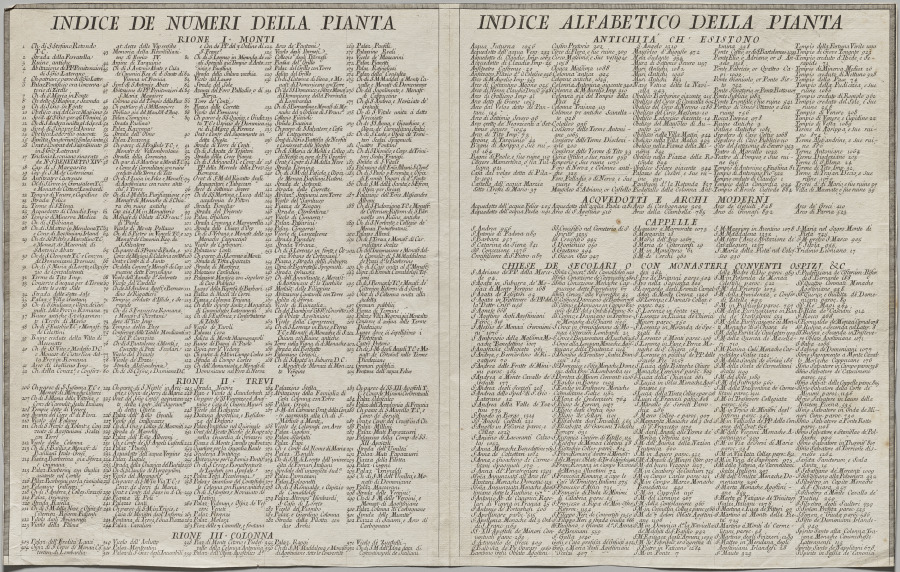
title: Nuova pianta di Roma data in luce da Giambattista Nolli l’anno MDCCXLVII, known as La Pianta Grande di Roma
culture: Italy, 18th century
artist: Giovanni Battista Nolli (Italian, 1701–1756)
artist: Carlo Nolli (Italian, 1690–1790)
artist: Rocco Pozzi (Italian, 1701–1774)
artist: Pietro Campana de Soriano (Italian, 1725–c. 1779)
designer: Stefano Pozzi (Italian, 1699–1768)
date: 1748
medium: etching and engraving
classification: Print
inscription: Written in pencil on verso: "2 August Bossi (?)"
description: The monumental Pianta Grande di Roma, or Large Plan of Rome, which measures about 5 x 7 feet when its twelve plates are assembled, is a landmark in both cartography and printmaking. The map is considered the first scientific rendering of Rome, establishing new standards of accuracy and thoroughness when it was published in 1748. Devised by the Lombard architect and surveyor Giovanni Battista Nolli (Italian, 1701-56), the creation of the map required over ten years of surveying the city carried out by Nolli and a team of assistants with the help of new measuring devices. In Nolli’s “ichnographic” (also called “ground”) plan, architectural features and the urban infrastructure are reduced to a single horizontal slice, a minutely detailed footprint that conveys dimensions, proportions, and orientations to scale with the utmost clarity.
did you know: To make this map, Pope Clement XII granted the mapmaker permission to measure courtyards and other interior, inaccessible spaces in monastic communities, even those in nuns’ convents, which was controversial at the time.